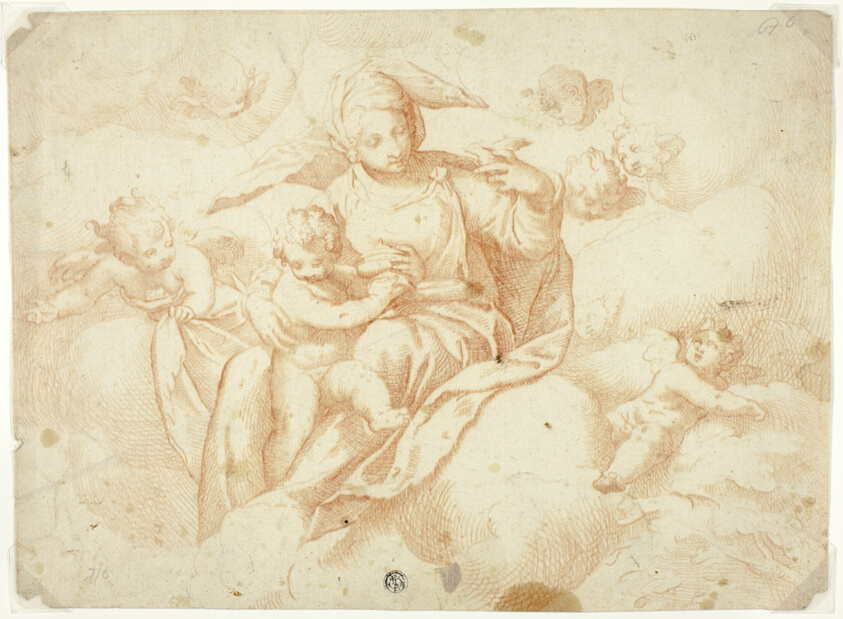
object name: Drawing and Watercolor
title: Virgin and Child Seated on Clouds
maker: After Paolo Farinati; Italian, 1524-1606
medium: Red chalk on ivory laid paper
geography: Italy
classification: chalk; drawings (visual works); prints and drawing